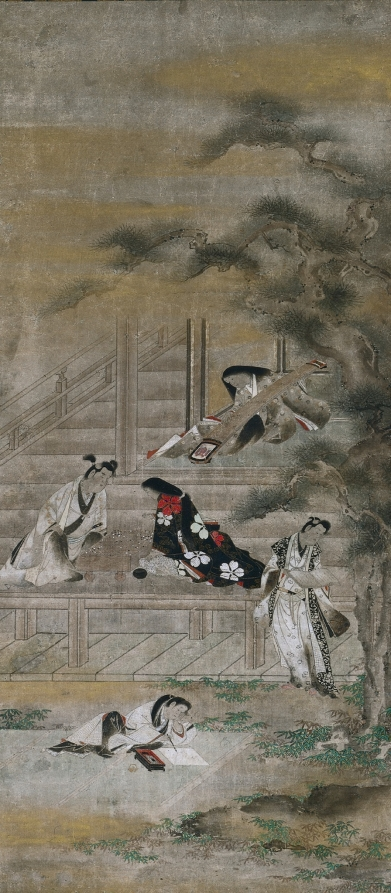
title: The Four Accomplishments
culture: Japan, Edo period (1615–1868)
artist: attributed to Iwasa Matabei (Japanese, 1578–1650)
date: c. 1620–50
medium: Hanging scroll; ink, color, and gold on paper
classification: Painting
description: This painting shows a woman playing a koto, a type of stringed instrument; a pair playing a board game called Go; a man deep in a book; and a boy painting an image of flowers. The group of fashionably dressed figures is set in and around a cozy residence, their poses conveying a sense of carefree pleasure. The scene is a playful response to a theme derived from Chinese culture that presents four notable pastimes of well-educated people.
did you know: The small, golden jar holds water to mix with the youth's ink for his painting.